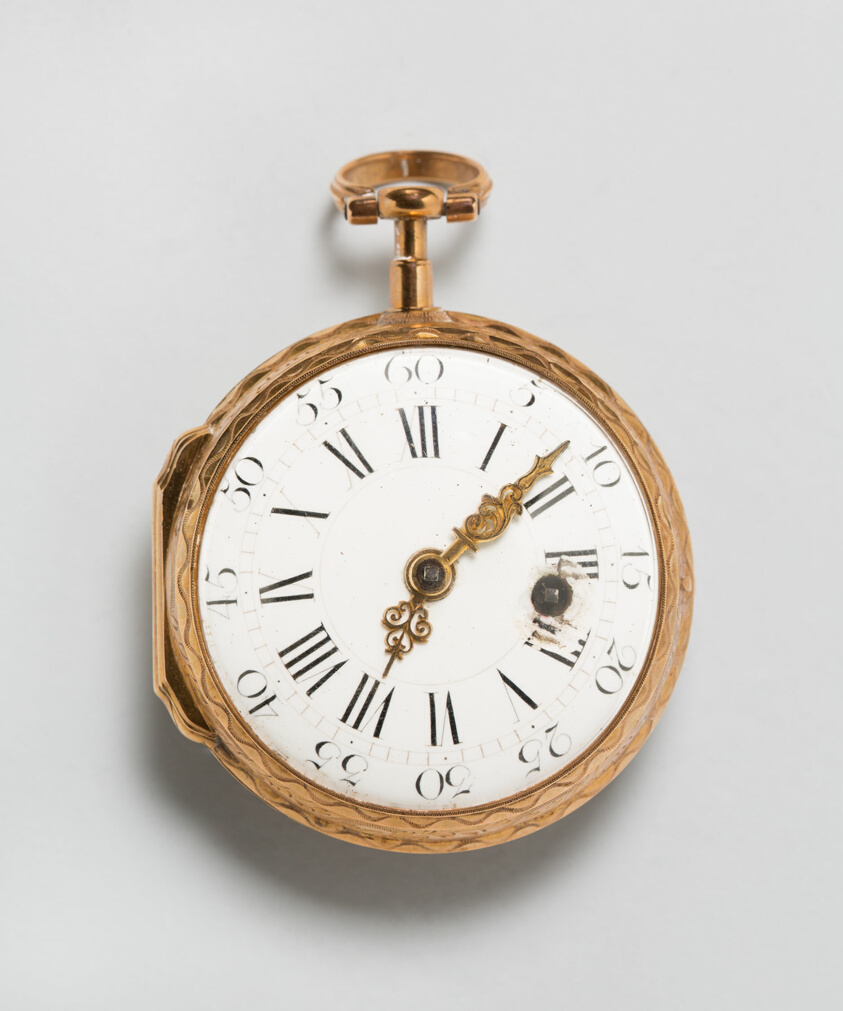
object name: Metalwork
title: Watch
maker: Jean Baptiste Baillon; French, active 1751-70; Paris, France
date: 1760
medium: Gold and enamels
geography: France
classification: gold; metal; watch; european decorative arts; metalwork